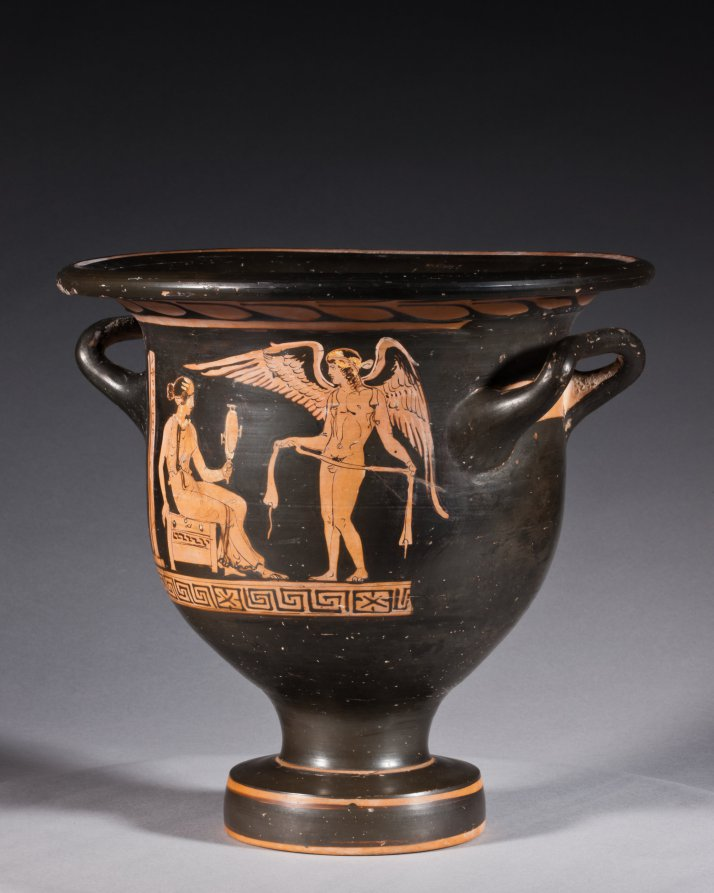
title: Red-Figure Bell Krater (Mixing Vessel): Aphrodite and Eros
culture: South Italian, Apulian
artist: attributed to Graz Painter (South Italian, Apulian, active c. 380–360 BCE)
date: c. 370–360 BCE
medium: ceramic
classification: Ceramic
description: This small mixing vessel shows a finely dressed woman seated on a chest and holding up a mirror to admire herself. Before her stands Eros, the winged god of love, holding a ribbon or sash. Behind the woman stands a pillar with the inscription ΑΦΡΟΔΙΤΗ, or APHRODITE, the goddess of love. Such labels are rare on vases, and scholars debate whether this names the woman shown as Aphrodite herself, with her son Eros, or a bride envisioning herself as Aphrodite, just before her wedding.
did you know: The dancing nude youths on the reverse are unusual; typically they would be standing and draped.